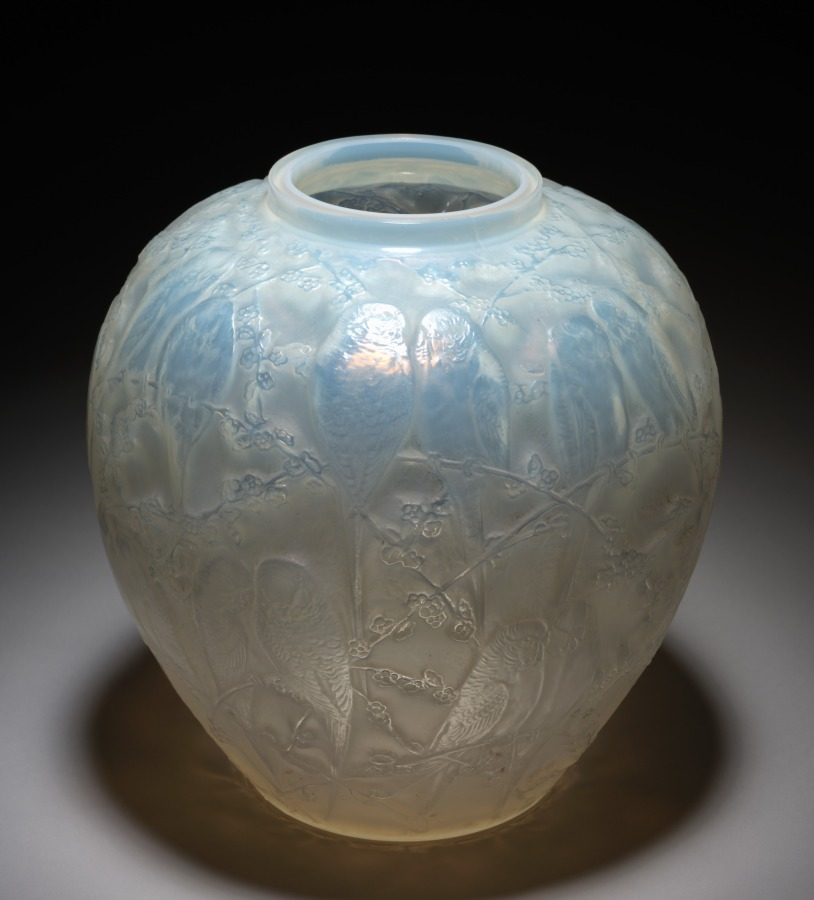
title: Vase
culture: France, 20th century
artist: firm of René Lalique (French, 1860–1945)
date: c. 1930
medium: glass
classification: Glass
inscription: signature from mold on bottom: "R. LALIQUE"; etched on bottom: "FRANCE" and "11594."